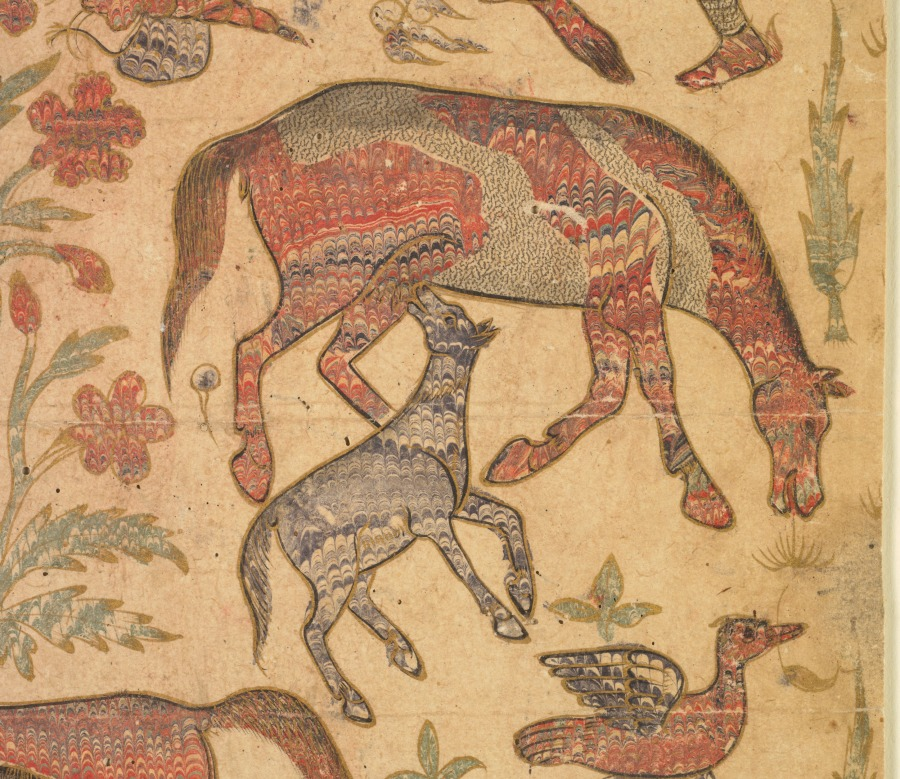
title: A marbled picture of Rustam catching Rakhsh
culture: India, Bijapur, Deccan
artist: attributed to Shafi (Indian, active about 1650)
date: c. 1650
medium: Gum tempera and gold on paper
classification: Painting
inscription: apocryphal inscription lower left: 'amal-i mir Kalan 904 verso: inscription identifying the scene of Rustam capturing Rakhsh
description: This scene depicts the young hero Rustam catching a foal, Rakhsh (meaning “light”), who will be his faithful companion through many adventures. A prophet-like shepherd figure with a staff at the upper left predicts that Rustam will be the savior of Iran. At the top of the page a feline has caught its prey, while a hunter steps on its tail. This extraordinary painting has more applications of marbled colorant than any other known example. Even all the flowers and birds have been articulated through marbling in a feat of registration and control by a master of the technique.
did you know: Even the flowers and insects used as filler in this composition were marbled.